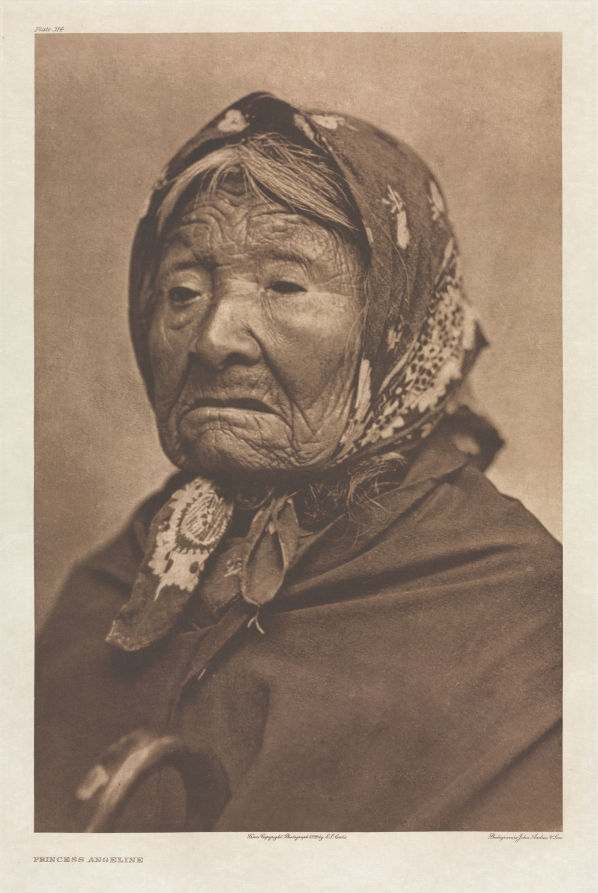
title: Portfolio IX, Plate 314: Princess Angeline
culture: America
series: The North American Indian: being a series of Portfolios picturing and describing the Indians of the United States, the Dominion of Canada, and Alaska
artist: Edward S. Curtis (American, 1868–1952)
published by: The University Press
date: 1899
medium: photogravure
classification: Portfolio